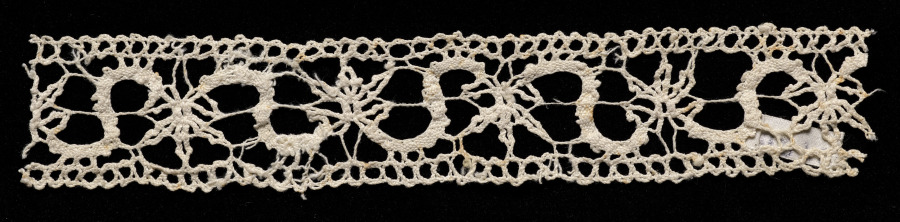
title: Lace Insertion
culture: Italy, Venice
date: 1500s–1600s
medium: Bobbin lace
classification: Lace